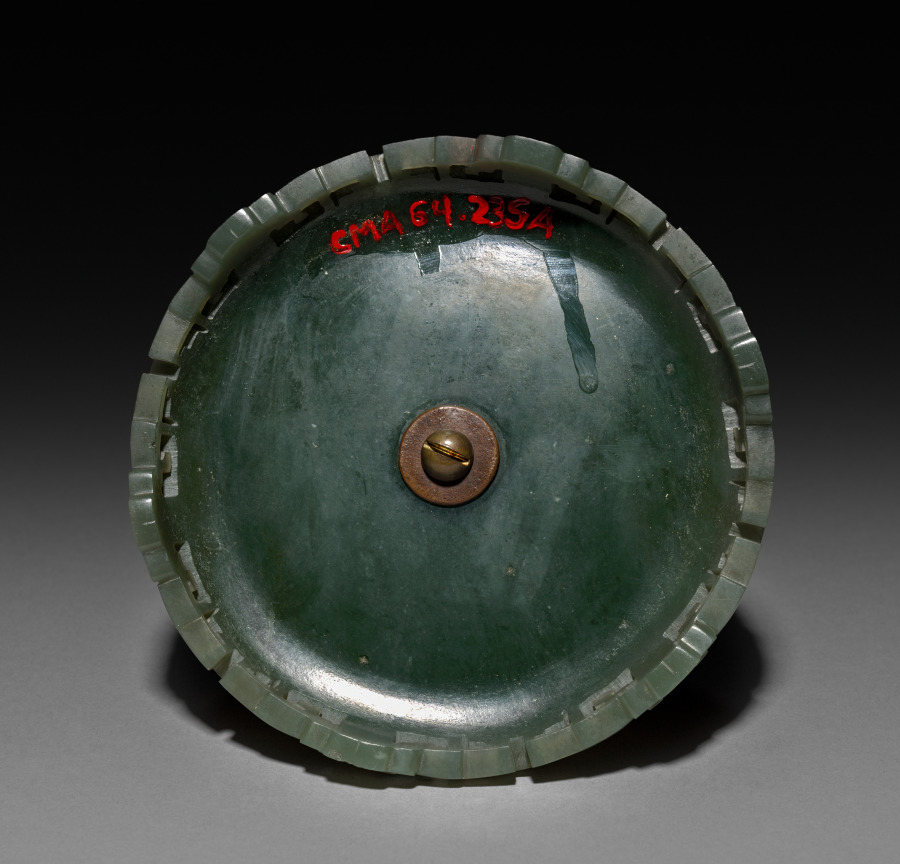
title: Cylinder (base)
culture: China, Qing dynasty (1644-1911) or Republican period (1912-49)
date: 1800–1940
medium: carved jade and gilt bronze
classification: Jade